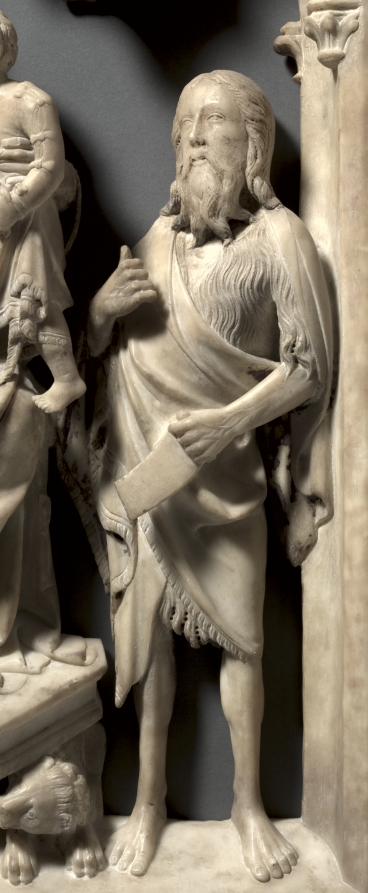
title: Madonna and Child with Saints Catherine and John the Baptist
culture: Italy, Siena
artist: Giovanni di Agostino (Italian, c. 1310–1370)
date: c. 1340–50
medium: marble with traces of polychromy and gilding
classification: Sculpture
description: The Madonna is seated beneath a Gothic-arched canopy flanked by Saints Catherine and John the Baptist. A rectangular frame encloses the group. Most likely from a Sienese church interior, the work is probably a fragment of a larger sculptural program such as a tomb. An authentic Gothic style in sculpture appeared in Tuscany from the mid 1200s through about 1350 elucidated by the work of Giovanni di Agostino, Nicola and Giovanni Pisano, and others who were active on Siena Cathedral’s sculptural program. Agostino’s work suggests an awareness of Gothic sculpture and the decorative arts in France from which he borrowed freely. This relief was probably completed just before the plague of 1348, an event which altered the degree and character of Sienese art.